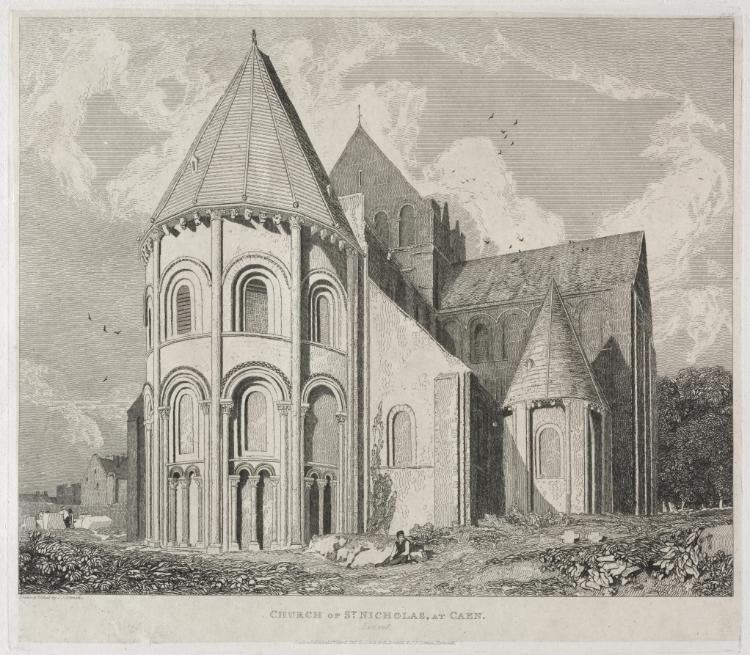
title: Church of St. Nicholas, at Caen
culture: England, 19th century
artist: John Sell Cotman (British, 1782–1842)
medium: etching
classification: Print